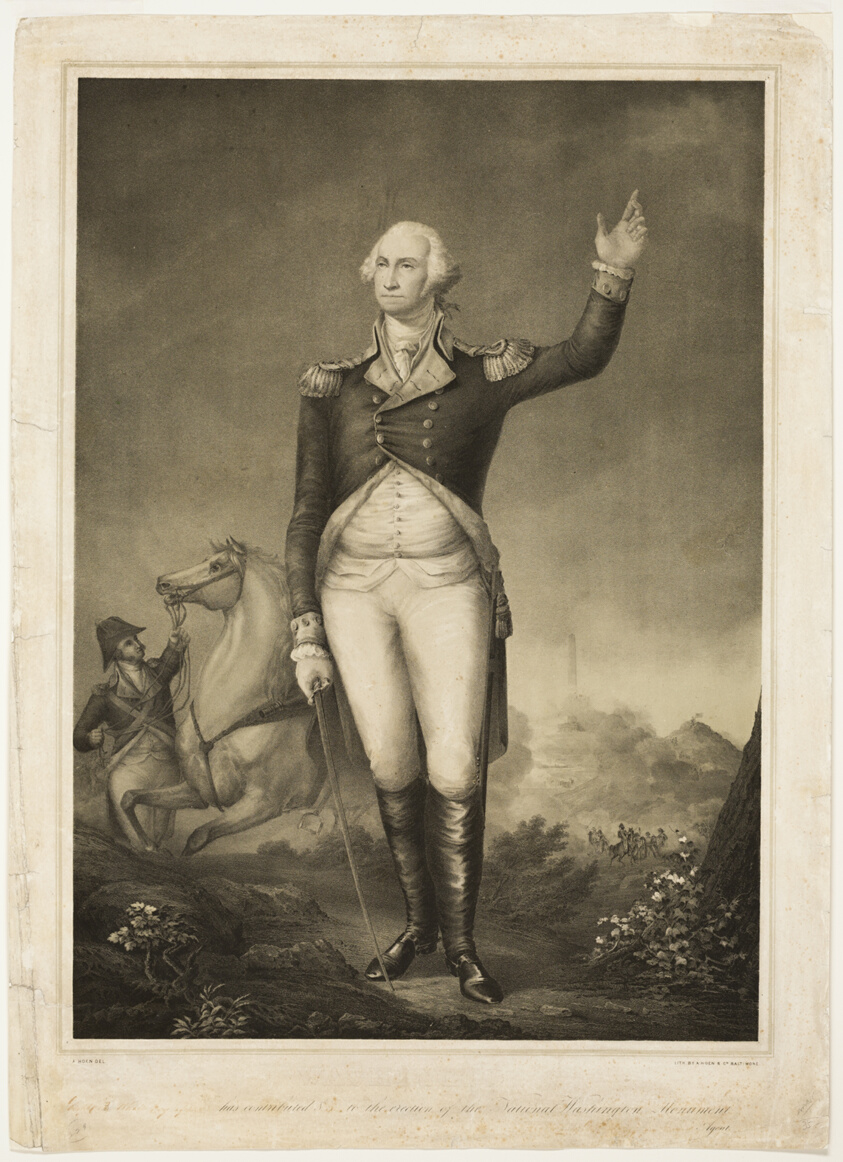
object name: Print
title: Washington Monument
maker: August Hoen (American, 1817-1886)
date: 1846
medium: Tint lithograph on ivory wove paper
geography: United States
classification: lithograph; print; prints and drawing